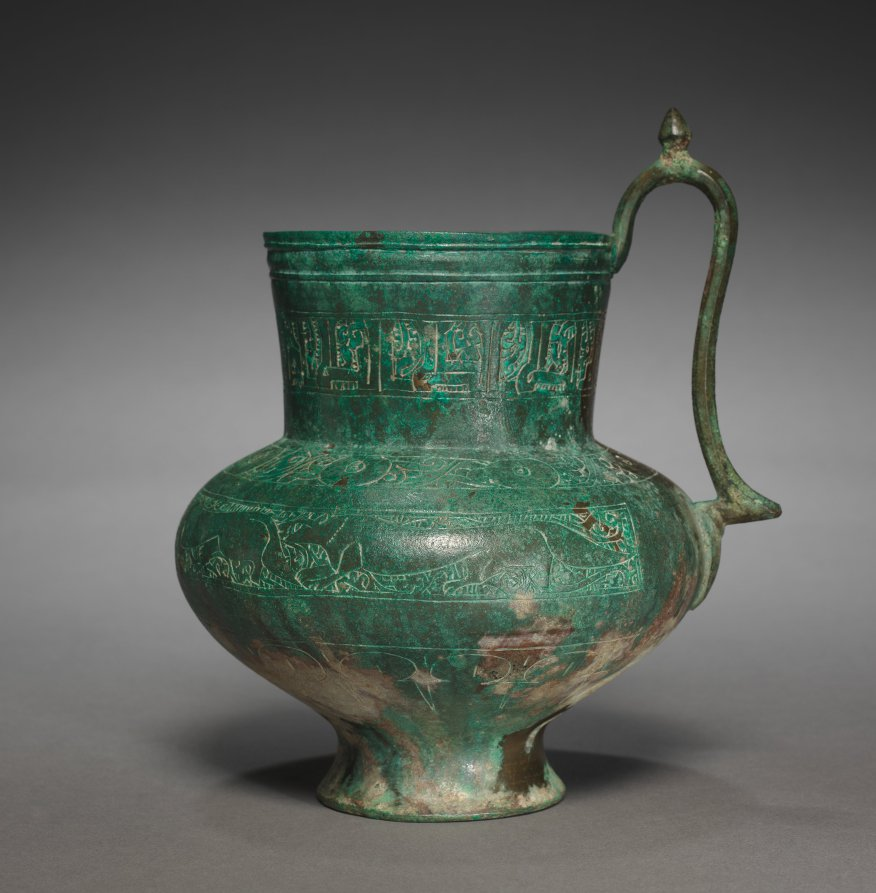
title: Jug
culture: Iran, Khurasan, Nishapur, Seljuk Period, 12th century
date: 1100s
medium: cast brass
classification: Metalwork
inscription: Kufic inscription, undeciphered